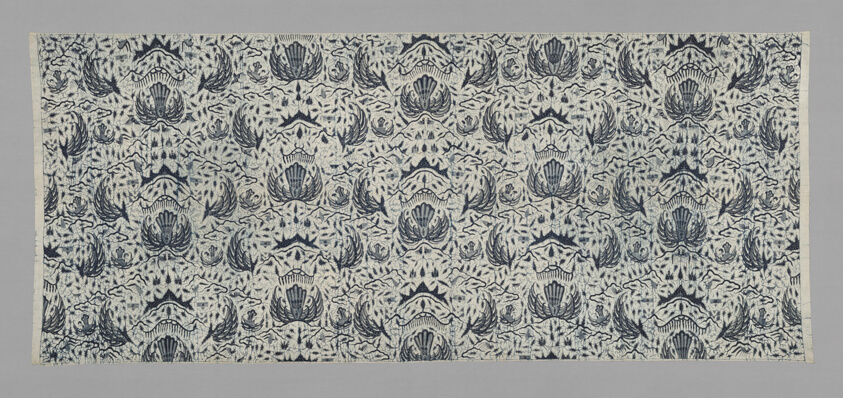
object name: Textile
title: Panel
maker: Java, Indonesia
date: 19th century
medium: Batik dyed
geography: Java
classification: textile; weaving; costume